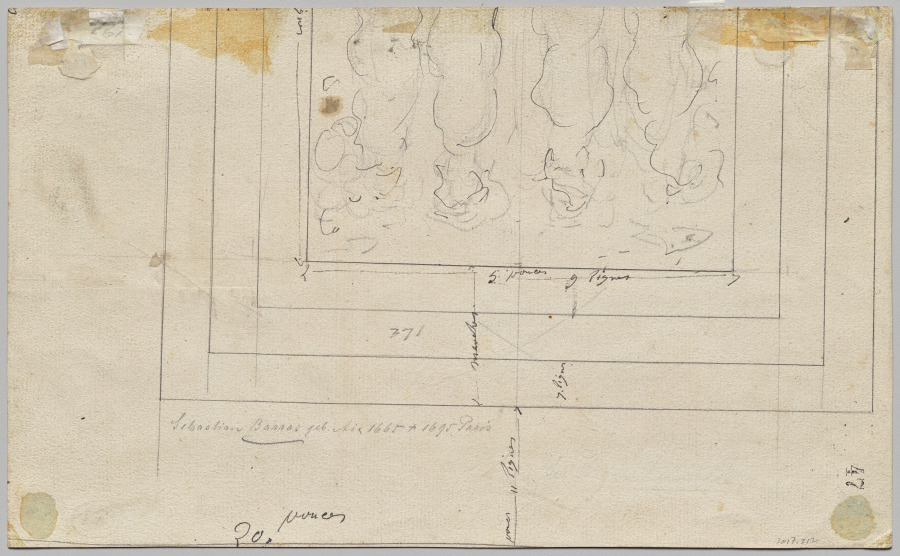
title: Venus at the Forge of Vulcan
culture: France, 18th century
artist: Louis Félix de La Rue (French, 1731–1777)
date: 18th century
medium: Pen and brown ink, and brown wash (bistre) with red chalk and traces of graphite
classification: Drawing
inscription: verso of secondary support: center, in graphite: 371; lower center, in graphite: [illegible name ?] Aix 1665-1695 Paris; ruled lines and other illegible notations in black ink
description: Venus, the goddess of love, descends on a cloud into the forge of Vulcan, the god of fire and metalworking. This scene illustrates an episode from Virgil’s Aeneid in which Venus has come to collect the suit of armor she asked Vulcan to make for her son, Aeneas. Several putti on the left play with the finished product.